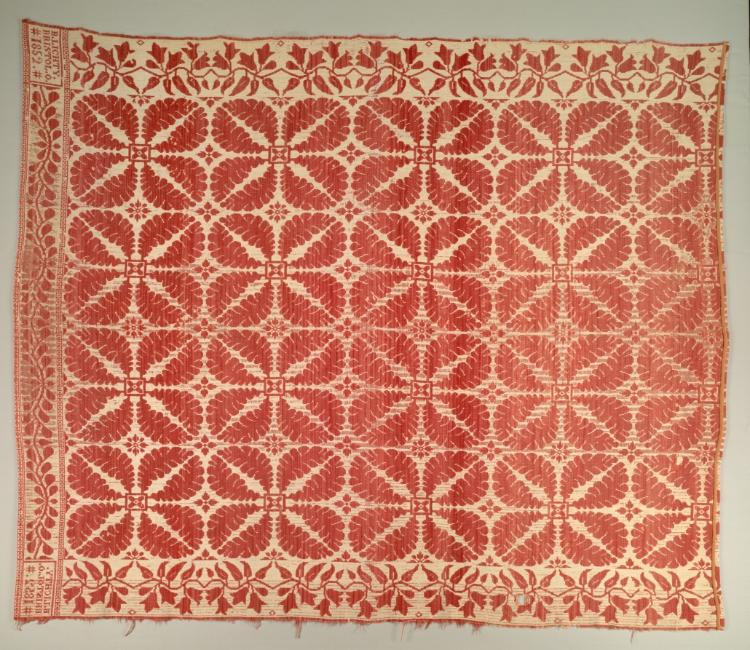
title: Coverlet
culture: America, Ohio, Jackson Township, Bristol, 19th century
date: 1852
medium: Jacquard double weave: wool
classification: Textile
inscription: "B. Lichty. Bristol, O. 1852."